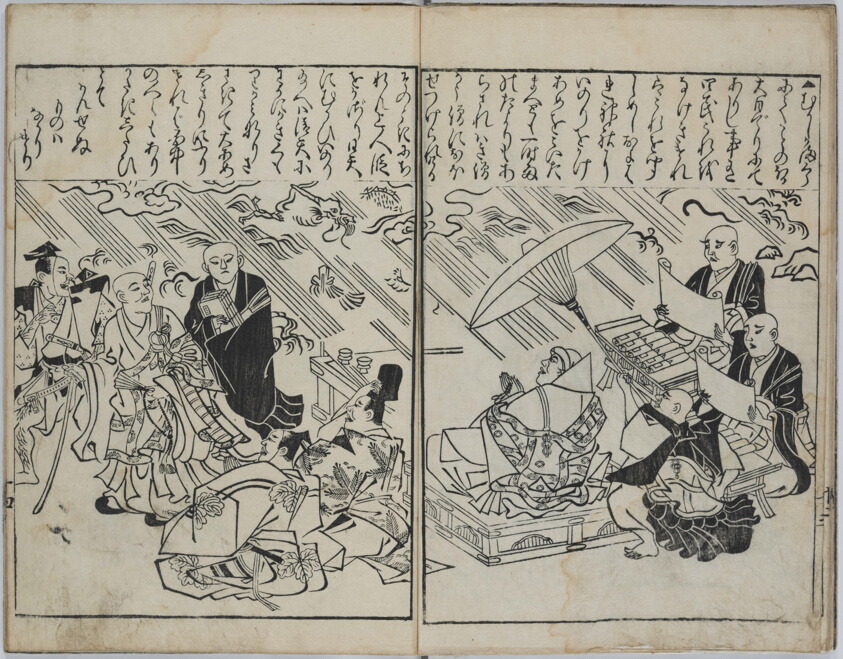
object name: Book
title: A Collection of Japanese Paintings (Yamato e-zukushi)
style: Japanese (culture or style)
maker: Hishikawa Moronobu 菱川師宣; Japanese, 1618-1694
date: 1680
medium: Woodblock printed book, sumizuri-e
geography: Japan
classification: book; woodblock